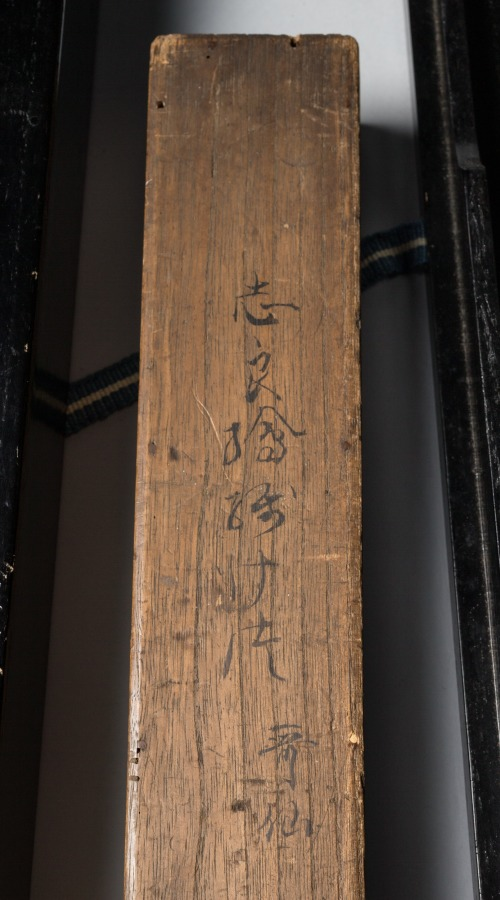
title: Section of an Illustrated Tale of Genji Poetry Contest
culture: Japan, Muromachi period (1392–1573)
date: 1400s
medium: section of a handscroll mounted as a hanging scroll; ink on paper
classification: Painting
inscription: 四十六番 左 ひげくろの大将 心さえ空にみだれし雪の［も」夜に ひとりさえつるかたしきの袖／ 四十七番 うきことを思ひさわ げばさまざまに くゆるけむりぞ いとど たち そふ／ 四十八番 すがくれてかず にも あらぬ かりのこを いづかたにかはとりかくすべき／ 右 雲井のかり かぎりとてわすれがたきを わするるも こや世に なびくこころな るらむ／ あさきなを いひ ながしける かわ ぐちは いかが もらしし せきのあらがき／ あわれをもいかに しりてか なぐさ めむ あるや 恋しき なきや かなしきに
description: This hanging scroll was once part of a handscroll depicting a waka (thirty-one syllable verse) poetry contest between characters from the 11th-century literary classic Tale of Genji. In this section, a woman known informally as Kumoi no kari, or “Goose in Fog,” after a lovelorn line she hums in the novel, is pitted against Higekuro no taishō, or “General Blackbeard.” Three of his poems, numbered 46 to 48, from “The Handsome Pillar” chapter appear over his image. The subsequent three poems inscribed above Kumoi no kari are presented as her “responses,” and come from "The Plum Tree Branch", “New Wisteria Leaves”, and "Evening Mist" chapters.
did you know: General Blackbeard laments having smelly ash poured upon him by his angry wife in one of the poems.